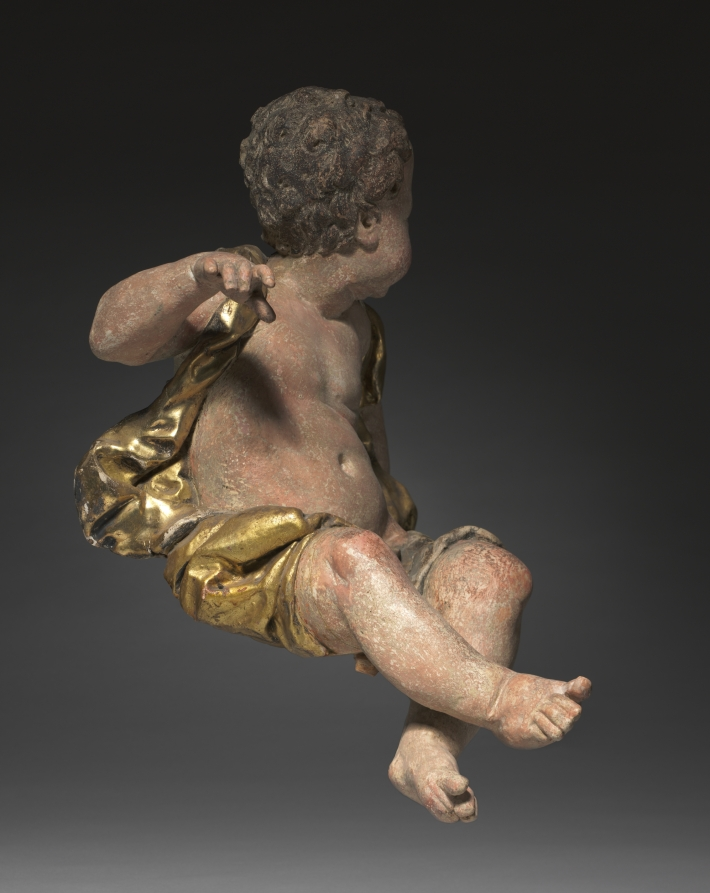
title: Putto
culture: Germany, near Bamberg, 18th century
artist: Ferdinand Tietz (Austrian, 1708–1777)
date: mid-1700s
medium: painted and gilded wood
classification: Sculpture